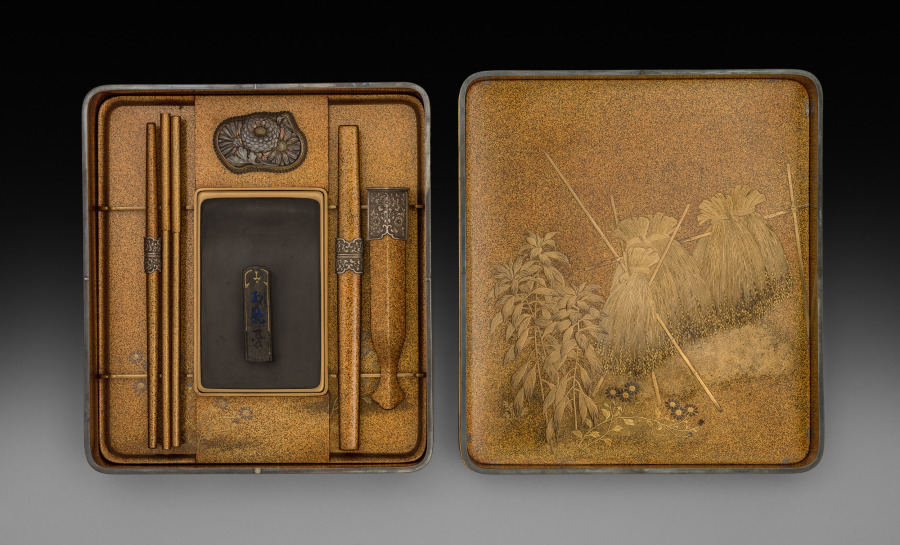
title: Writing Box (Suzuribako) with Chrysanthemum and Plum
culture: Japan, Meiji period (1868–1912)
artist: Sasaki Takayasu (Japanese, 1845–1929)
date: late 1800s-early 1900s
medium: Lacquer over wood with gold and silver sprinkled powder (maki-e)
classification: Lacquer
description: Both functional and elegant, this is a container for an ink stone, brushes, and ink from a set of writing tools that included a larger box for paper. Against a sleek gold lacquered ground, its artist has used restraint in sprinkled powder decoration (maki-e) to produce the design of cockscomb and harvested rice on the interior of the lid.